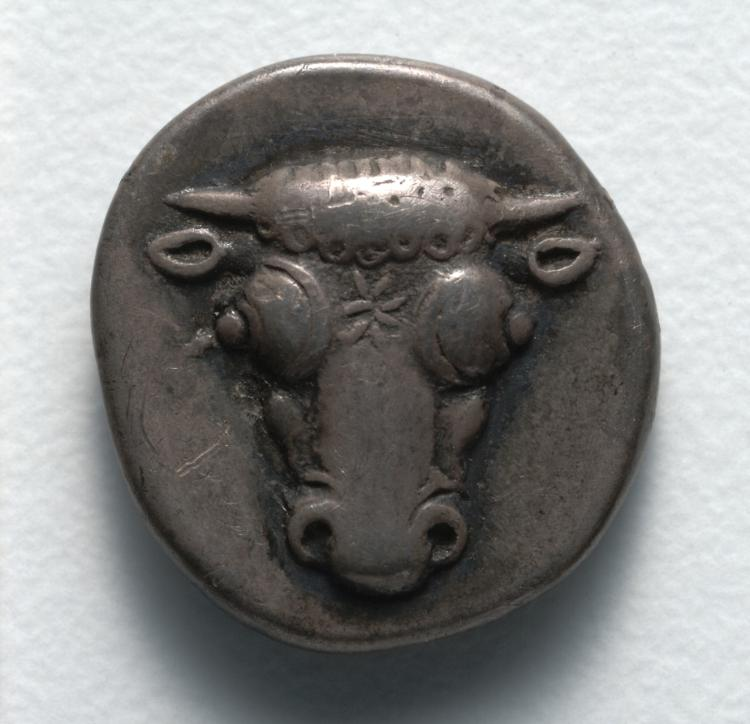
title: Hemidrachm: Bull's Head (obverse)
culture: Greek, probably minted at Phokikon (Phokis)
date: c. 485–480 BCE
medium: silver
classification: Coins